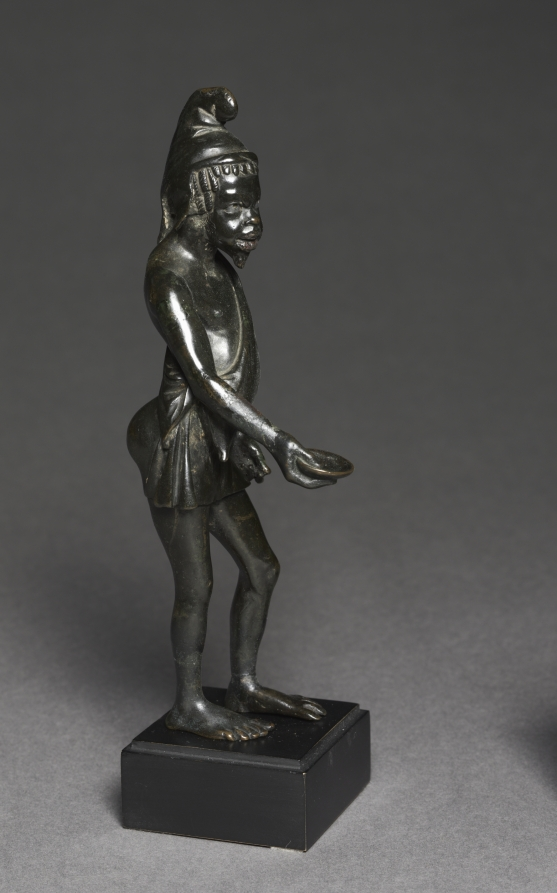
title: Statuette of a Black African Person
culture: Greece, Greco-Roman Period, late Ptolemaic Dynasty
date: 100–50 BCE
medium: bronze, solid cast, with silver and copper inlays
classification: Sculpture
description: Characterized as a Black African person by his hair, facial features, and unusually dark patina, this figure wears a non-Greek type of hat and a simple garment associated with lower classes. His stooped posture suggests that he may have a physical disability, something rarely depicted in Greek art. His right foot and right hand (with bowl) are modern restorations done before the statuette came to Cleveland, perhaps in the 1800s.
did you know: The intentionally dark patina contrasts with the inlaid silver eyes and copper lips.